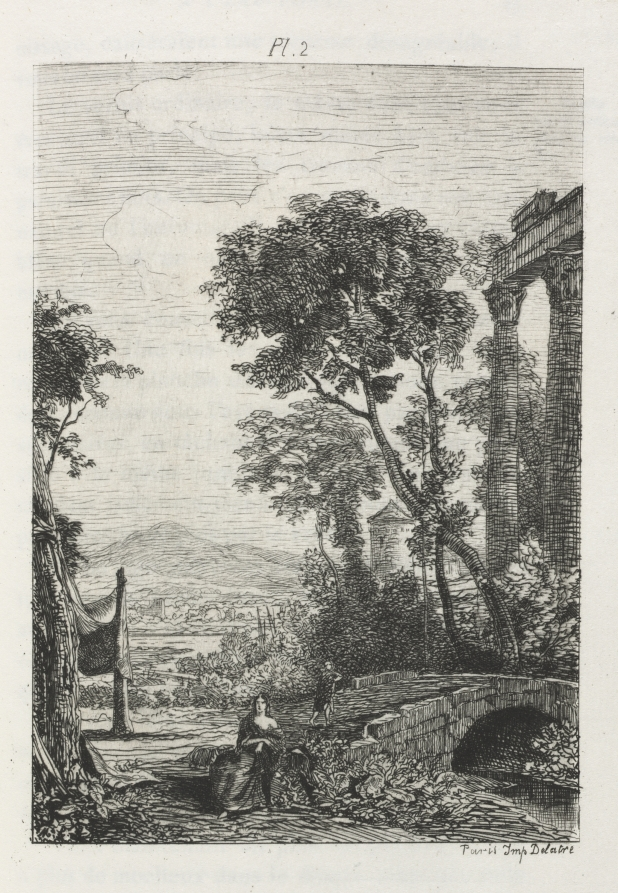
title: Traité de La Gravure a l’eau forte: Plate 2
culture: France, 19th century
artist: Maxime Lalanne (French, 1827–1886)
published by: Cadar and Luquet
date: 1866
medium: etching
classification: Bound Volume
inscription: on first page, in pencil: "J. H. Maghee 1874"